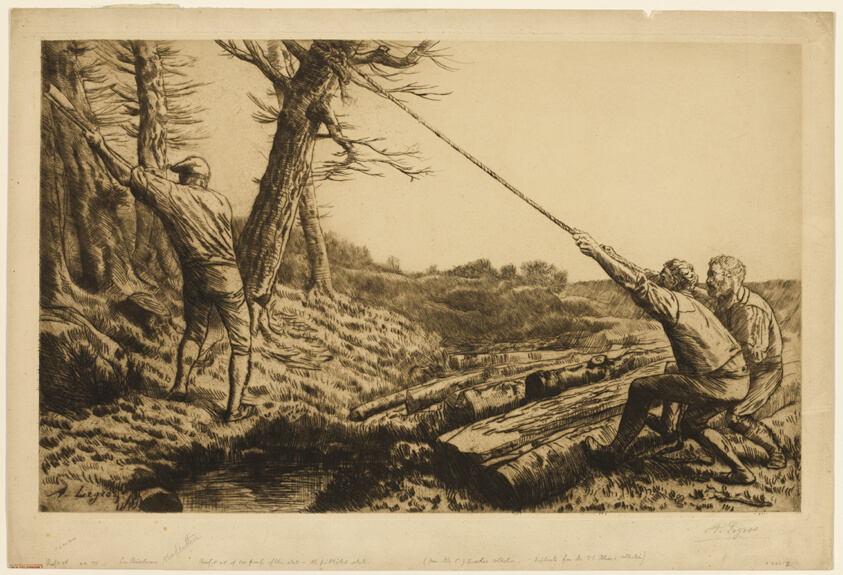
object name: Print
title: The LumberJacks, second plate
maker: Alphonse Legros (French, 1837-1911)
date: c. 1877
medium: Etching and drypoint printed in brown on cream wove paper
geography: France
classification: etching; print; prints and drawing